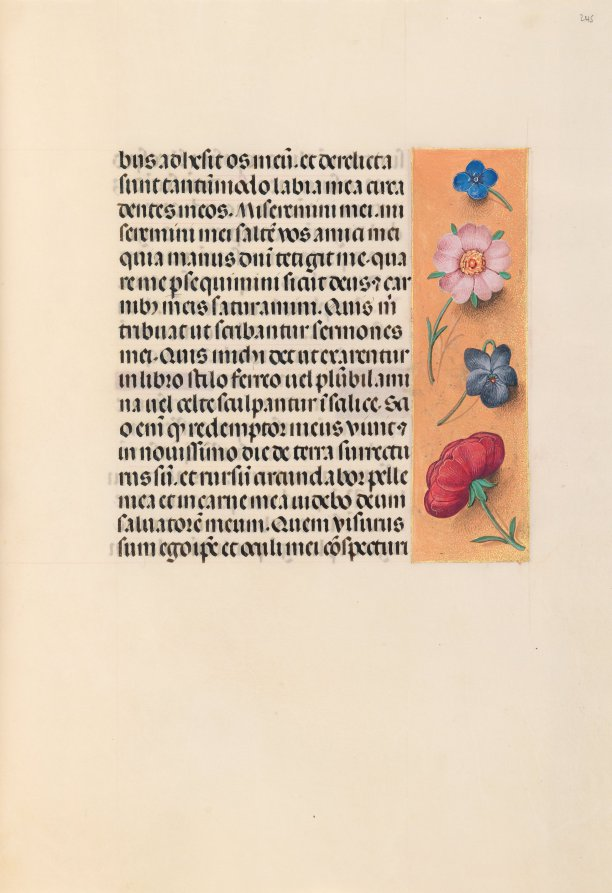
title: Hours of Queen Isabella the Catholic, Queen of Spain: Fol. 245r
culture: Flanders, Ghent and Bruges, late 15th century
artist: Master of the First Prayerbook of Maximillian (Flemish, c. 1444–1519)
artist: and Associates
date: c. 1500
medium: ink, tempera, and gold on vellum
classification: Bound Volume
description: This manuscript was illuminated by a circle of at least five highly organized manuscript painters active in the Flemish cities of Ghent and Bruges. The principal illuminator was Alexander Bening, who painted the majority of the book's miniatures. Manuscripts produced by this circle of artists are renowned for the decoration of their borders, which typically feature a rich variety of realistically-painted flowers, birds, and butterflies. This prayer book, called a book of hours, was intended not for a cleric, but for the private devotions of a lay person-in this case, Isabella the Catholic, Queen of Spain (1451-1504). Isabella's coat of arms embellishes the book's frontispiece. It is unlikely that the book was commissioned by the Queen herself; rather, she probably received it as a diplomatic gift from someone courting her patronage, perhaps Cardinal Francisco Jimenez de Cisneros. A Franciscan friar, Jimenez was dependent upon Isabella for his advancement, first to the post of Queen's confessor in 1492, and then to Archbishop of Toledo in 1495.